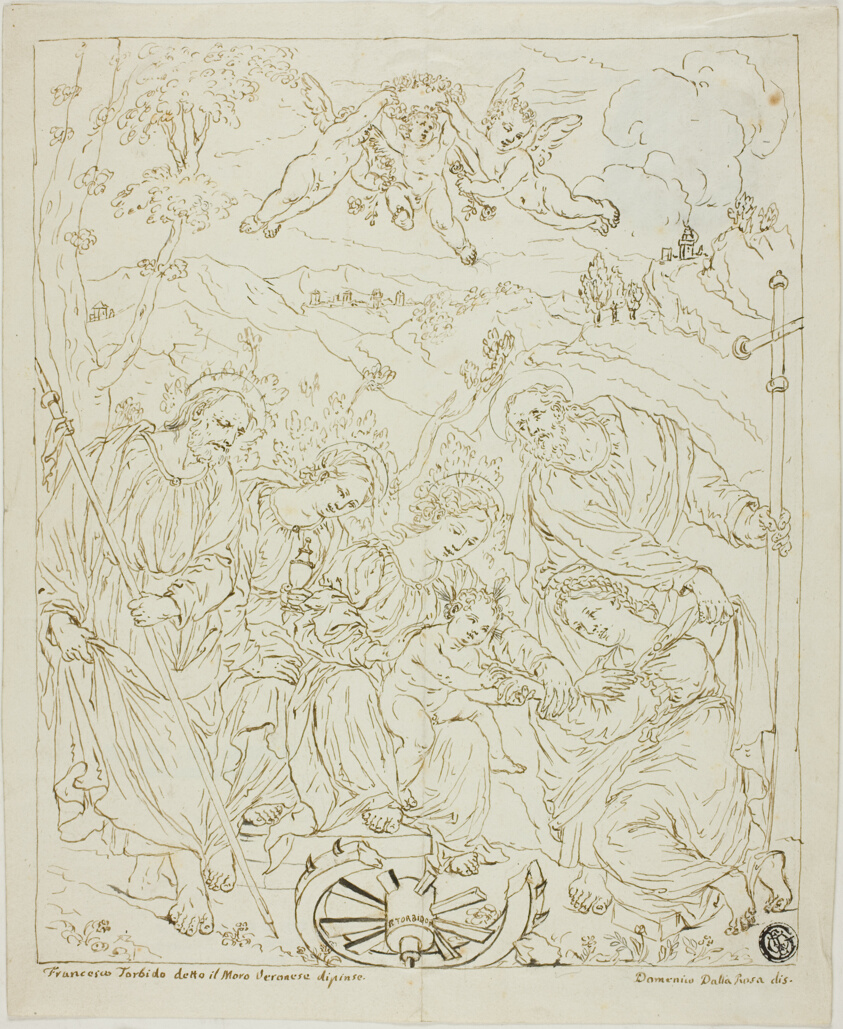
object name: Drawing and Watercolor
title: Marriage of Saint Catherine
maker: Domenico dalla Rosa (Italian, 1778-1834)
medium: Pen and brown ink, over traces of black chalk, on ivory wove paper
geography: Italy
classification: pen and ink drawings; drawings (visual works); prints and drawing